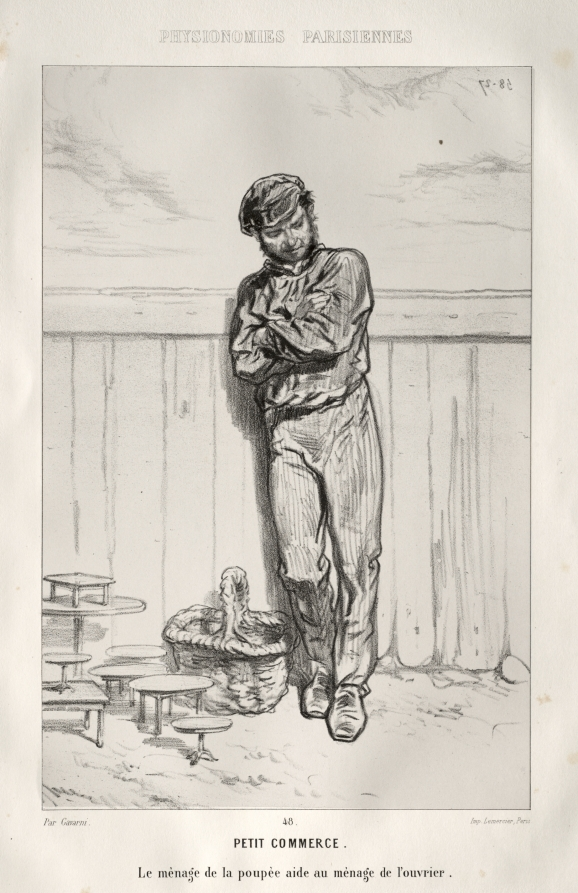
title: Petit Commerce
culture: France, 19th century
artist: Paul Gavarni (French, 1804–1866)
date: c. 1858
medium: lithograph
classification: Print